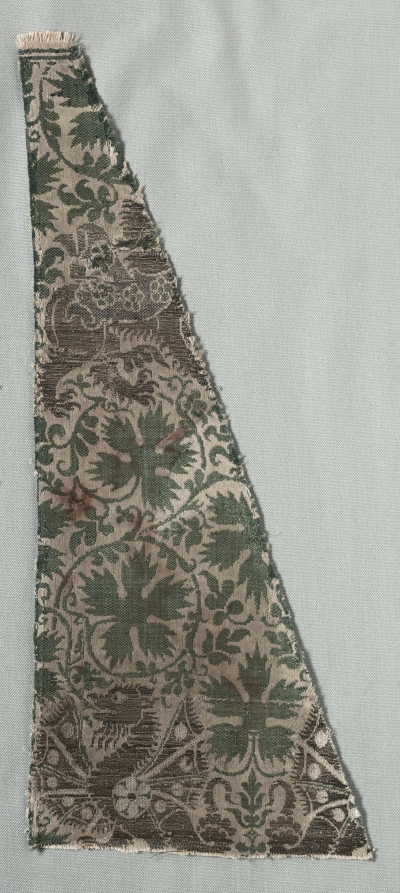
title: Silk Fragments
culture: Italy, Lucchese, second half of 14th century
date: 1350–1399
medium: lampas weave, brocaded; silk and gold thread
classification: Textile